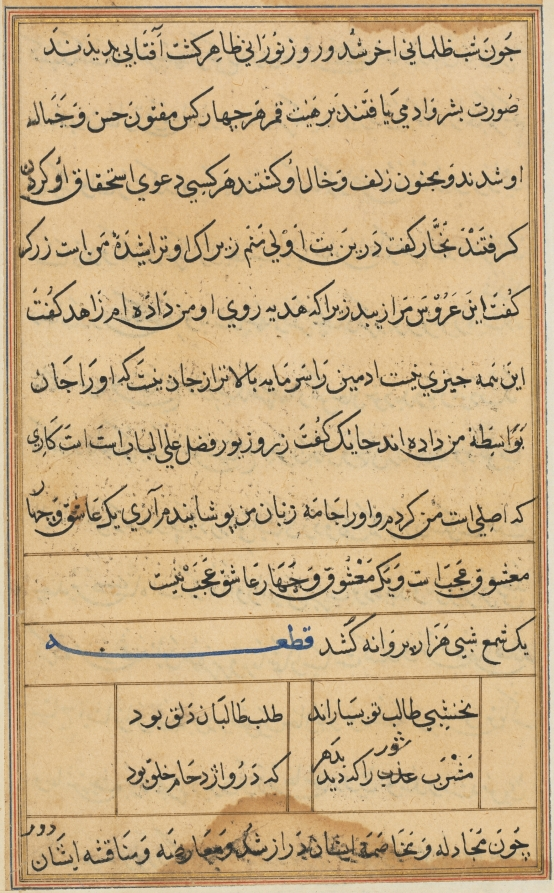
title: Page from Tales of a Parrot (Tuti-nama): text page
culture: Mughal India, court of Akbar (reigned 1556–1605)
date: c. 1560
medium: gum tempera, ink, and gold on paper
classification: Painting